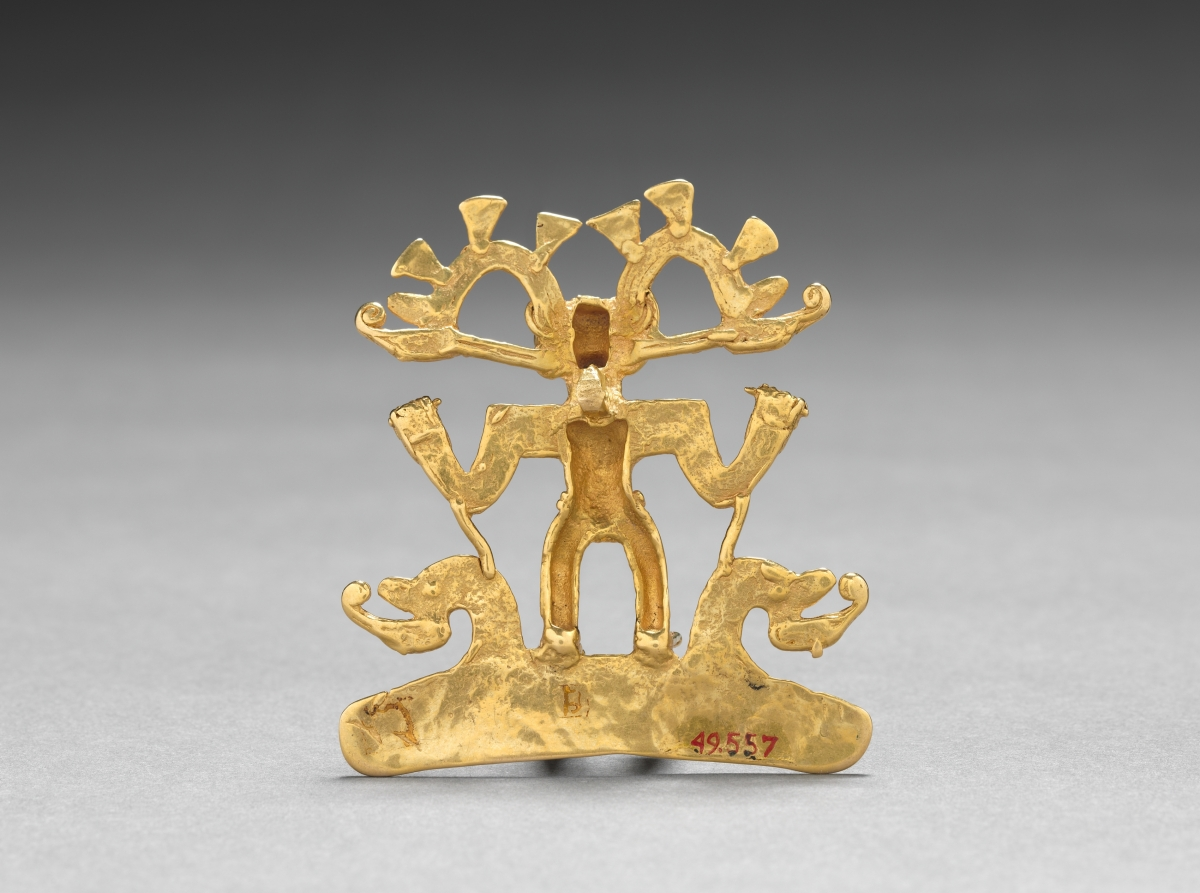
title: Bird-Man Pendant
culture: Western Panama, or Diquís, Costa Rica, Veraguas-Gran Chiriquí or Diquís Style, 8th-16th Century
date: c. 700–1550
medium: cast and hammered gold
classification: Metalwork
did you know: In the Panama-Costa Rica region, gold ornaments were associated with political and religious authority.